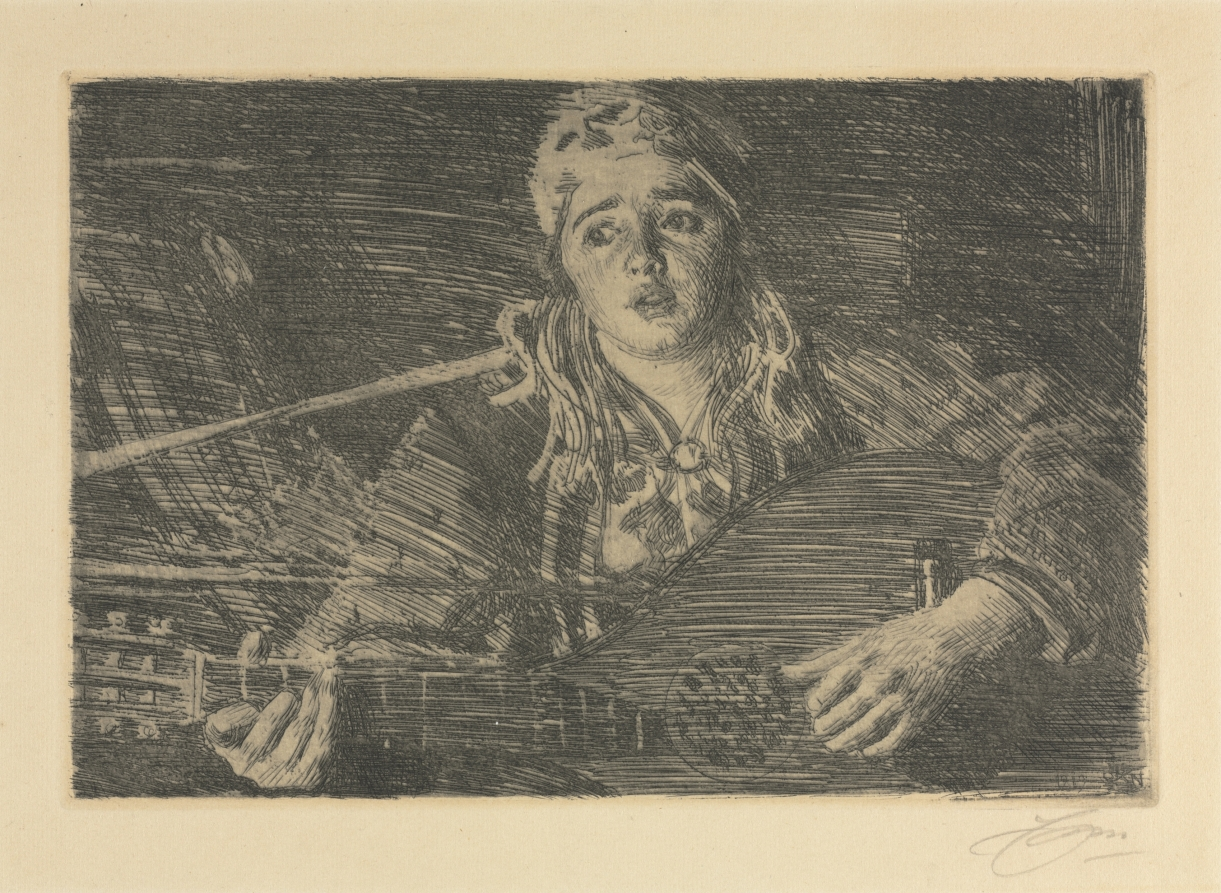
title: Ols Maria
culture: Sweden, 20th century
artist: Anders Zorn (Swedish, 1860–1920)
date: 1919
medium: etching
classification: Print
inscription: Lower right margin, in pencil: A Zorn